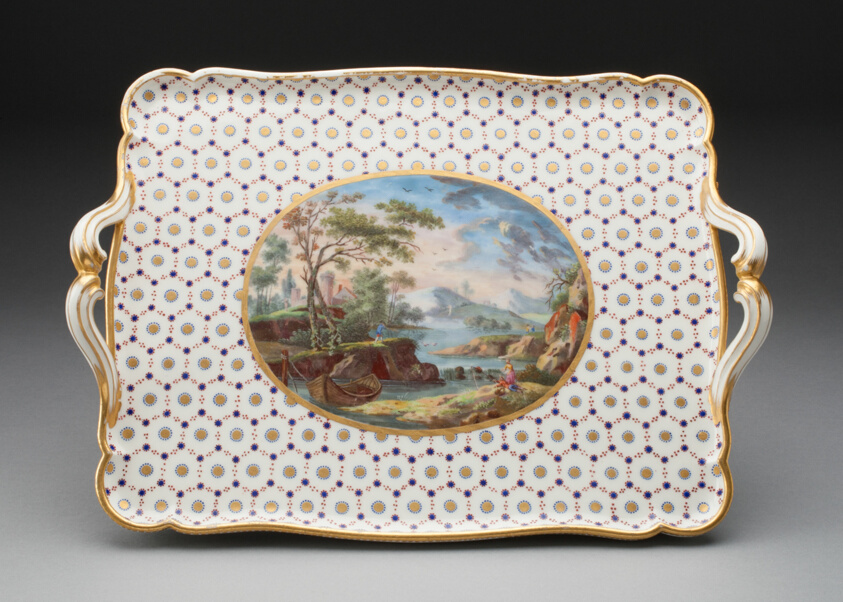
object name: Ceramics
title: Tray for a Tea Service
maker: Sèvres Porcelain Manufactory; French, founded 1740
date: 1768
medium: Soft-paste porcelain, polychrome enamels, and gilding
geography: Sèvres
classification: tray; teaware; ceramics; porcelain; european decorative arts